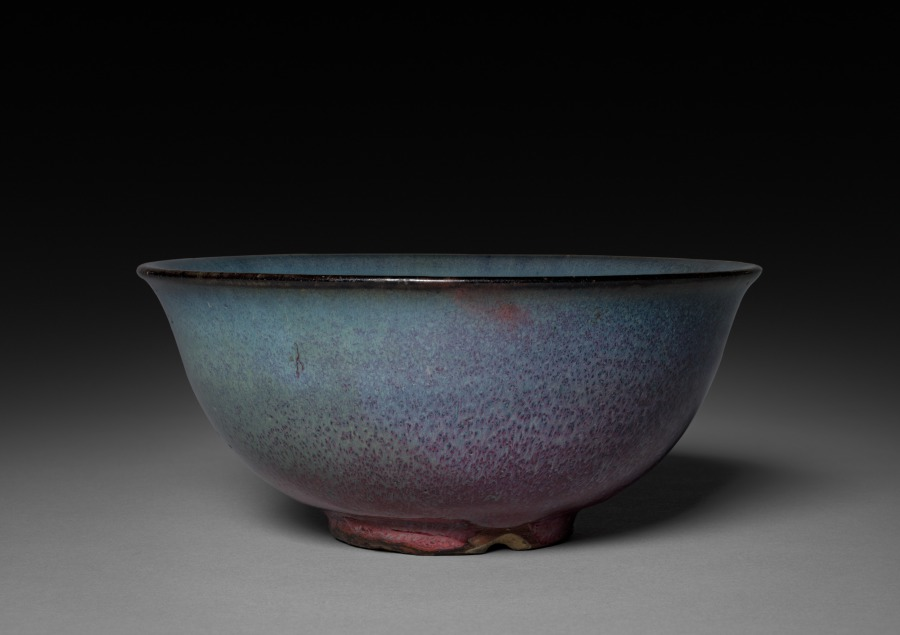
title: Bowl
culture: North China, Yuan dynasty (1271-1368) - Ming dynasty (1368-1644)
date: 1300s–1400s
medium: Glazed gray stoneware, Jun ware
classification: Ceramic